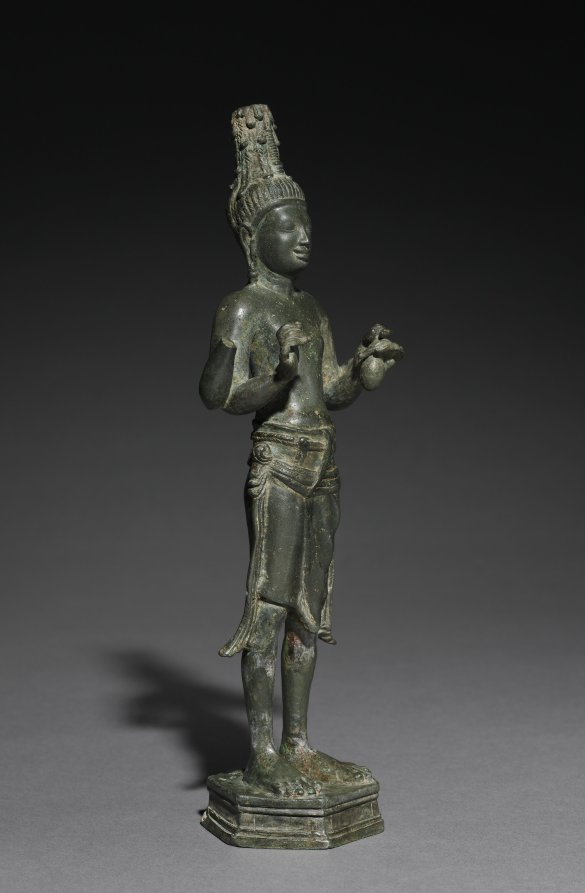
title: Maitreya: The Buddha of the Future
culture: Cambodia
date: 600s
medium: bronze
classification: Sculpture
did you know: The slender fingers of the left hand hold a water pot while the right hand is in the gesture of the vitarka mudra, a gesture of explanation and exposition.